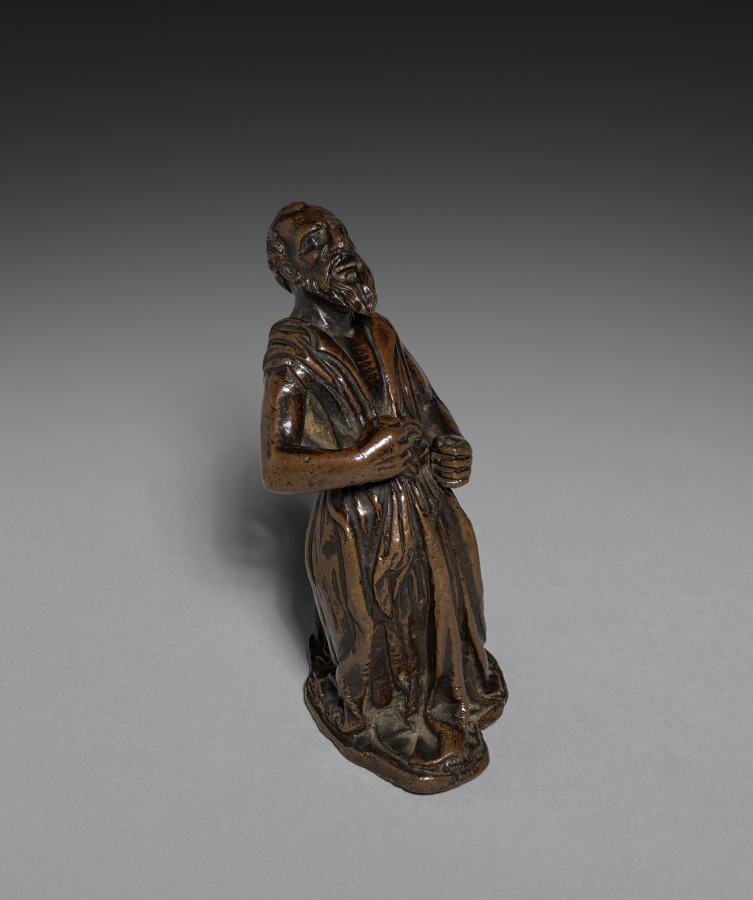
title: Kneeling Saint Jerome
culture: Italy, Ravenna, 16th century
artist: workshop of Severo da Ravenna (Italian, c.1496–c.1543)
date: c, 1525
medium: bronze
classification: Sculpture